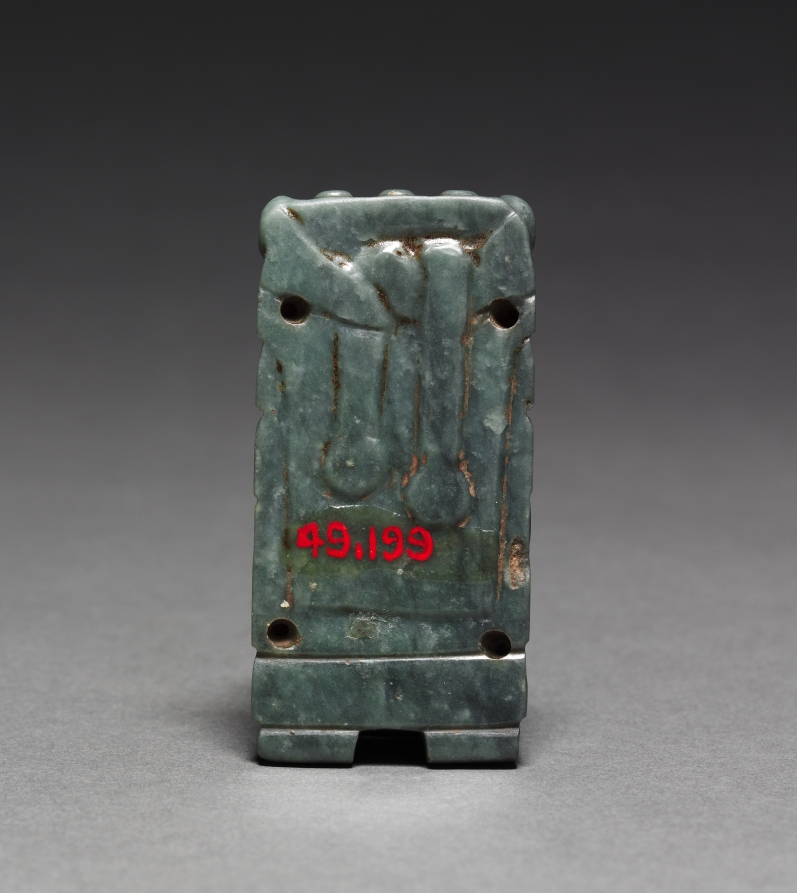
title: Goddess Plaque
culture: Central Mexico, Aztec, 13th-16th century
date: c. 1200–1519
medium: jadeite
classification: Jade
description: This pendant portrays Chalchiutlicue (Jade Skirt), a young goddess of water. Identifying insignia are her headband and the large tassels to either side of her face. She wears a huipil (long blouse) and skirt, and is posed kneeling, with her hands placed modestly in her lap. The green jade of which the pendant is carved symbolizes Chalchiutlicue's preciousness.